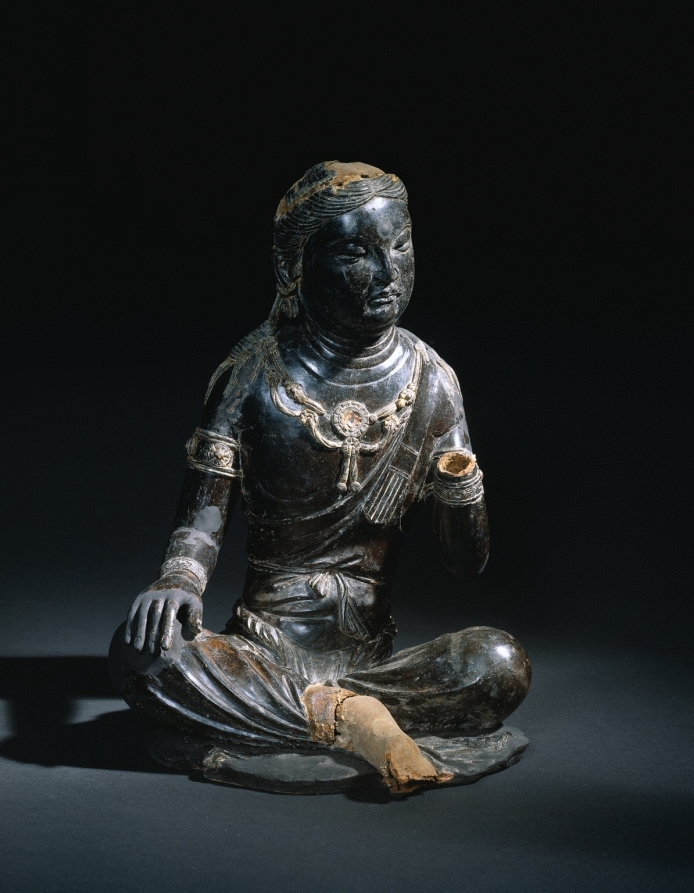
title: Bodhisattva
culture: China, Tang dynasty (618-907)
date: 700s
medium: dry lacquer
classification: Sculpture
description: The bodhisattva, an enlightened being dedicated to the spiritual awakening of all beings, is shown sitting in a relaxed pose, the eyes half-closed in an expression of profound meditation. The statue is modeled in a sensuous manner. It is made using the dry lacquer technique whereby a clay core is first constructed and then overlaid with fabrics saturated with lacquer. Once the lacquer layers are set, the core is removed. This kind of hollow dry lacquer statue is lightweight and easy to carry. The piece once suffered from severe surface retouching that distorted its original beauty. The museum's conservation work has removed coats of overpainting and over-restoration, revealing the true appearance of the glossy black lacquered surface with traces of cut-gold decoration and pigments.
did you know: While lacquer is tough and impervious to insects, it is less durable than wooden or stone sculptures, so this is a rare surviving Tang example.